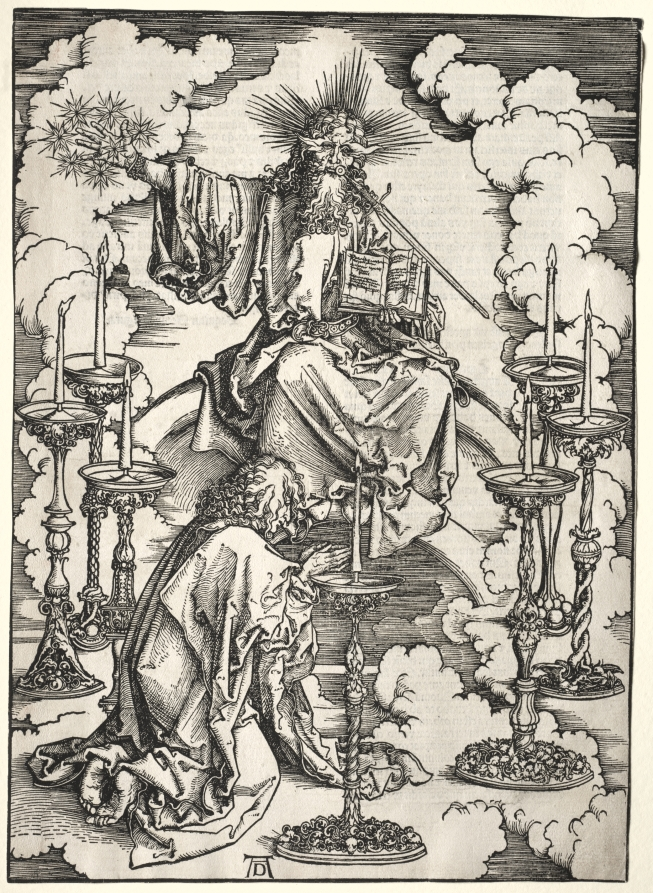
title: Revelation of St. John: St. John Beholding the Seven Candlesticks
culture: Germany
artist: Albrecht Dürer (German, 1471–1528)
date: 1511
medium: woodcut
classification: Print